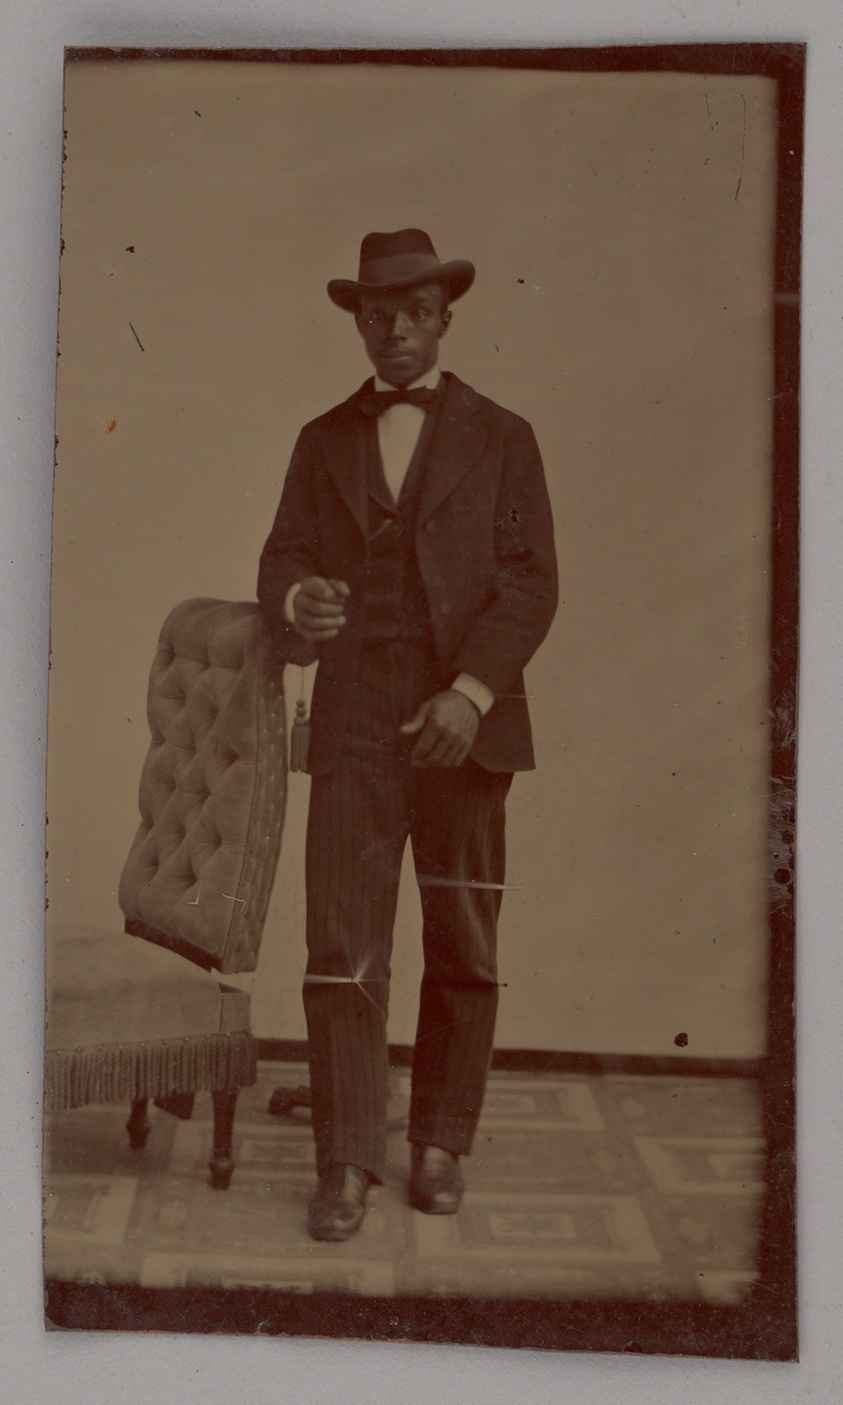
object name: Photograph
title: Untitled (Portrait of a Standing Man)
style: 19th century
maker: Unknown maker; American, 19th century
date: 1880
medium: Tintype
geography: United States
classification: portrait; tintype; photograph; photographic process; photography; portrait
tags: portraits: African American subject, lundberg collection, African American, portraits, portrait